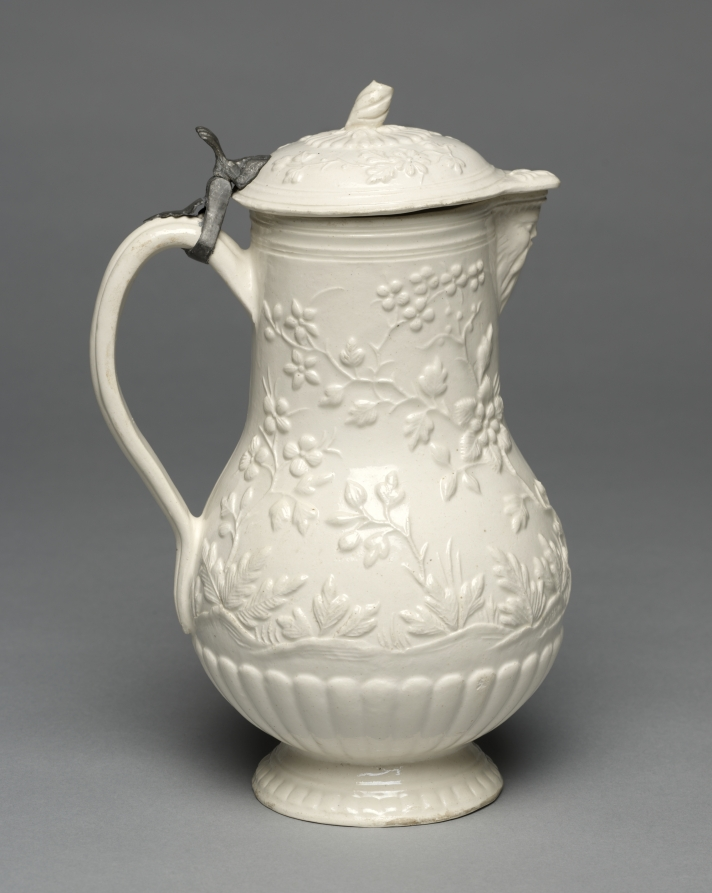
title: Covered Milk Jug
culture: France, Paris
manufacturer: Pont-aux-Choux Factory (French)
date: c. 1770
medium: Lead- glazed earthenware (faience fine); pewter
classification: Ceramic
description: Cream-colored earthenware was introduced by Wedgwood in the 1760s. He exported it to the continent, where it was quickly imitated. In France the ware was known as faience fine and the Pont-aux-Choux factory in Paris was the most famous manufacturer of such wares. Cream ware was harder and thus more durable than traditional faience.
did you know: Milk jugs with lids or covers usually held warm milk for coffee or tea.